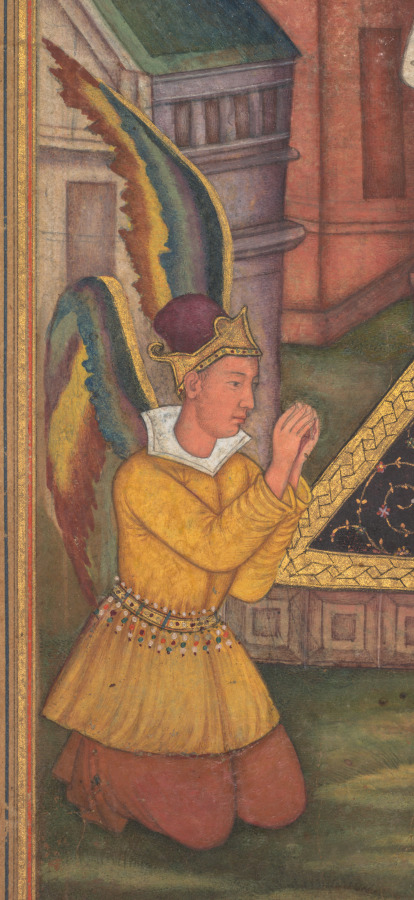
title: The Annunciation (folio 15 recto), from a Mirror of Holiness (Mir’at al-quds) of Father Jerome Xavier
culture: Mughal India, Allahabad, made for Prince Salim (1569–1627)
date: 1602–4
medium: Gum tempera, ink, and gold on paper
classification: Manuscript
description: Mary gazes down at the angel Gabriel as he kneels reverently, like a humble messenger, delivering the news that Mary will give birth to the son of God. His multicolored wings are forced within the boundary line of the painting field, visually implying a sense of subordination. Unlike many of the paintings in the Mirror of Holiness, the Annunciation is a familiar subject in European art, but the emphases vary. The Indian version depicts her as a queen, with a crown held above her head and attendants standing by.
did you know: The text states that Mary was only age 13 1/2 when the angel Gabriel came to her.